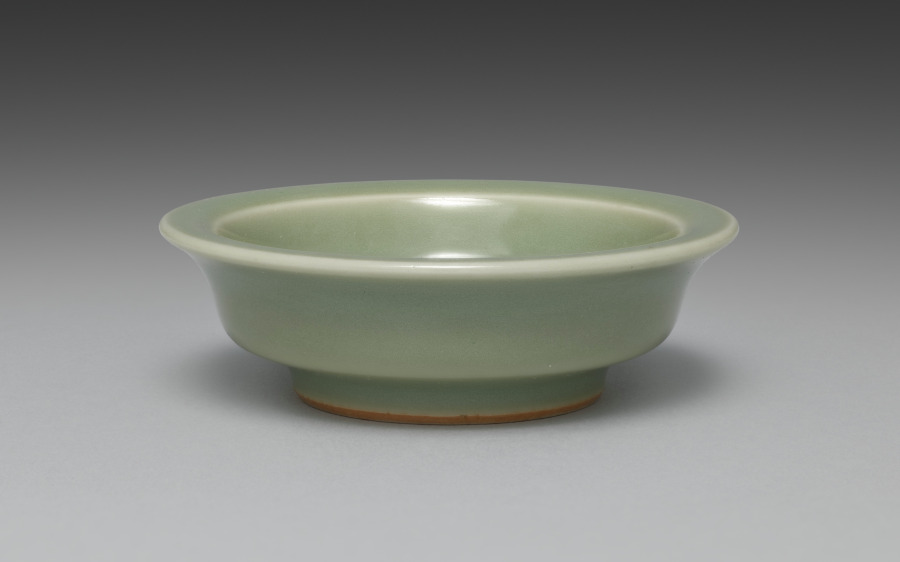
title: Saucer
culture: Japan, Meiji period (1868–1912)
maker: Seifū Yohei III (Japanese, 1851–1914)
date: 1893–1914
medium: One from a set of ten dishes; porcelain with green glaze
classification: Ceramic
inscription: 清風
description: Yohei III’s main output for his sophisticated clientele was in the form of tea sets and dining sets. He created a range of dishes in green glazes. He often produced in pairs, sets of five, or sets of ten. For this set of ten small dishes in a simple, round form that emphasizes the glaze above all, the box lid designates the piece as seiji, or green-glazed porcelain, using a general term for the extensive palette of green glazes often called celadon in English. The box lid further identifies the dishes themselves as tōchō, literally “bean-sized saucers,” a size that makes them suitable for dipping sauces.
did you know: The ten dishes in this set are stored in stacks of five in a two-compartment box.